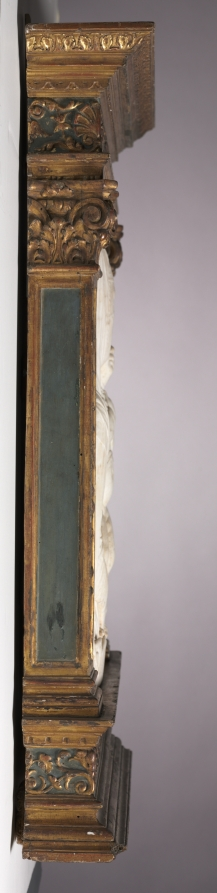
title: Virgin and Child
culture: Italy, Venice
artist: workshop of Pietro Lombardo (Italian, c. 1435–1515)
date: c. 1475–1485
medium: marble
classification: Sculpture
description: In the later 1400s, artists increasingly infused sacred subject matter with a classical vocabulary. The shallow relief and simplified forms ultimately stemmed from ancient sculpture, bringing gravity as well as novelty to a conventional theme. Yet naturalistic elements such as the baby’s bulging navel, chubby wrists, and shirt pulled up to reveal his genitals all humanize Christ, a critical principle of Christian dogma.